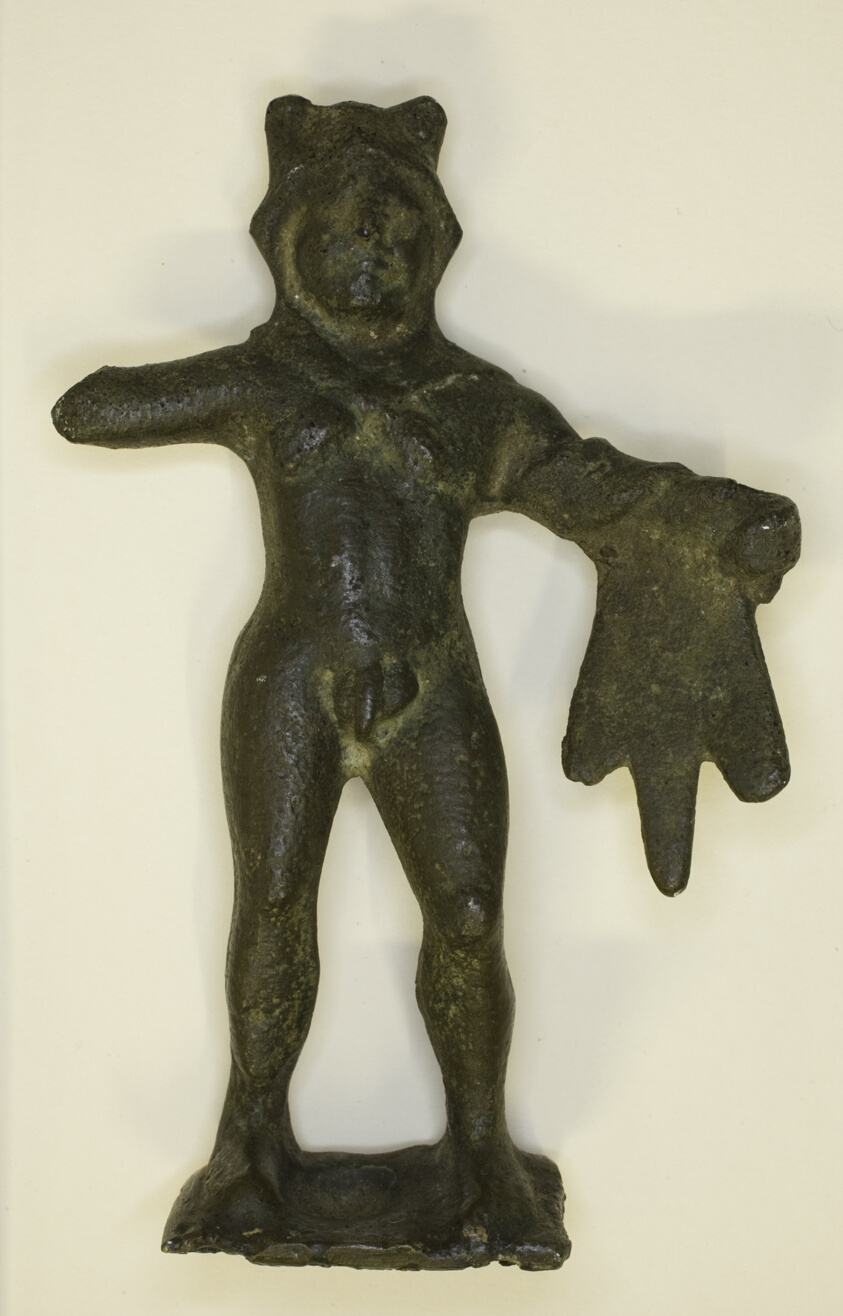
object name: Sculpture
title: Statuette of Herakles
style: etruscan, ancient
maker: Etruscan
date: 3rd-2nd century BCE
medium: Bronze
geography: Etruria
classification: statuette; bronze; metal; sculpture; ancient art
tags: Heracles